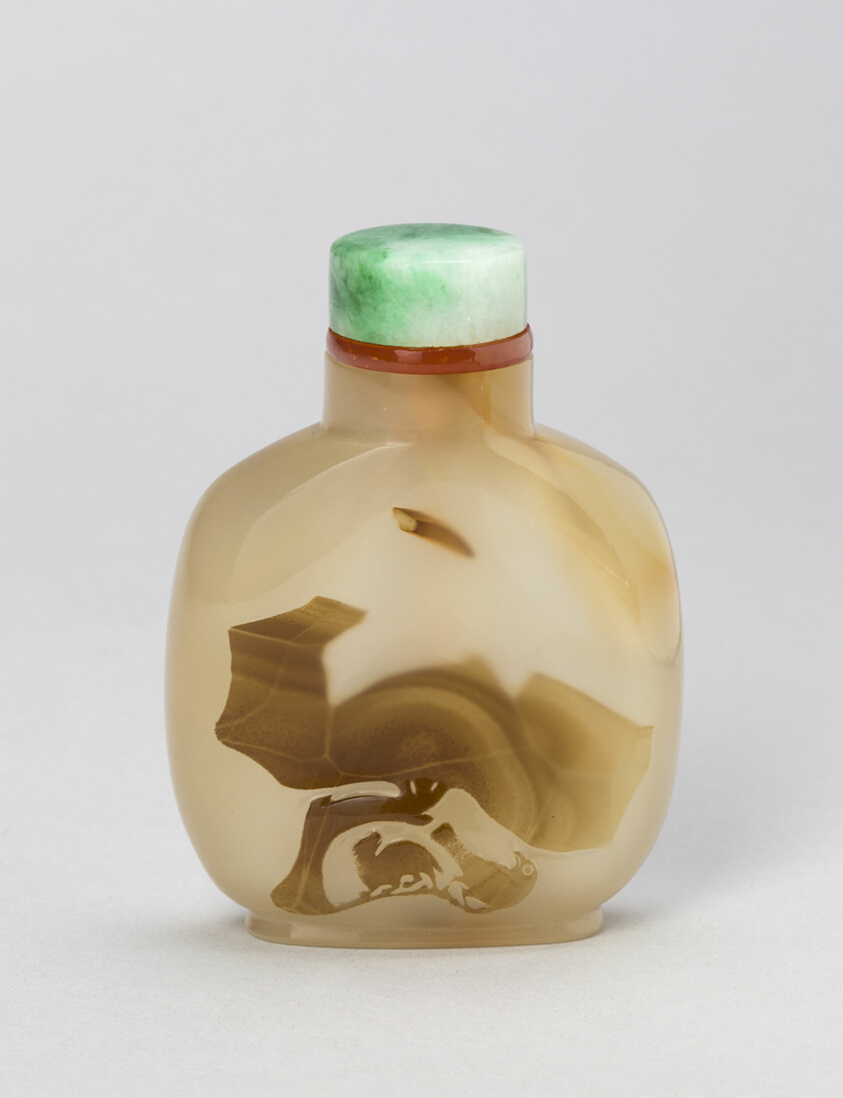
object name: Vessel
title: Snuff Bottle with a Hawk and a Bear beneath a Tree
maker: China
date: Qing dynasty (1644–1911), 1820–1880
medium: Shawdow agate with carved decoration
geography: China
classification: snuff bottle; asian art; vessel